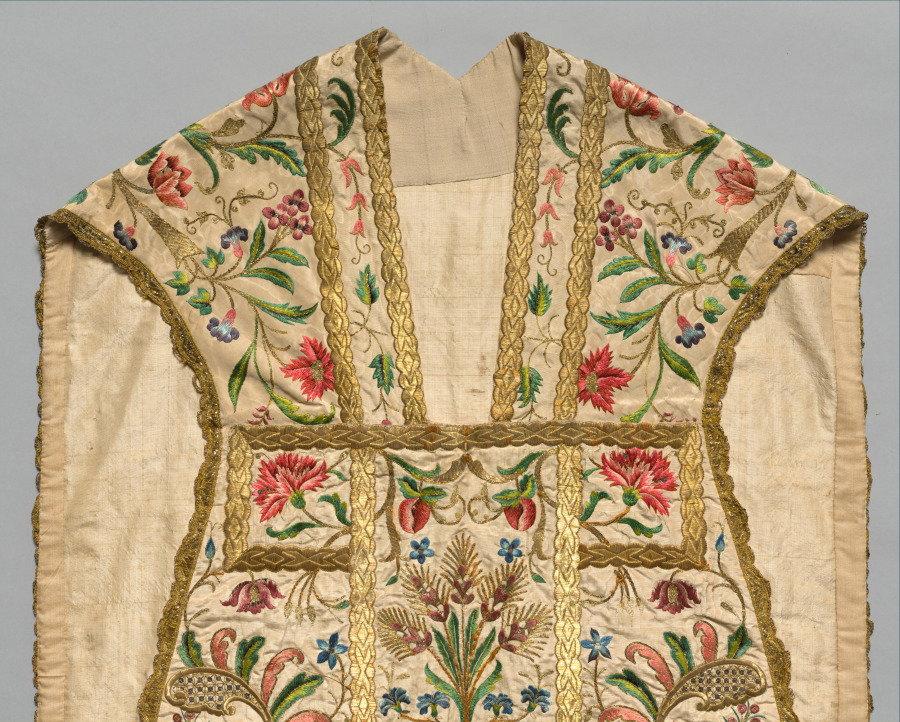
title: Chasuble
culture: Italy, 18th century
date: 1700s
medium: Silk and metallic threads; embroidery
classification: Textile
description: A beautiful design emanates from a vase in the center of this chasuble, displaying symmetrical flora that extend across embroidered gold braids into graceful curvilinear cartouches, reflecting contemporary architectural decoration. Also in the center, sheaves of wheat and grapes represent the bread and wine of the Mass. Gold sequins within thread-outlined squares illustrate fine quality workmanship. The decoration of the stole and chalice veil is similar to the chasuble, also on moiré (watered) silk fabric. The stole, an insignia of the office of deacons and priests, is worn under a chasuble, and the chalice veil—bearing the monogram of Jesus Christ, ihs, in the center—covers the chalice and paten (the plate holding the Eucharistic bread).